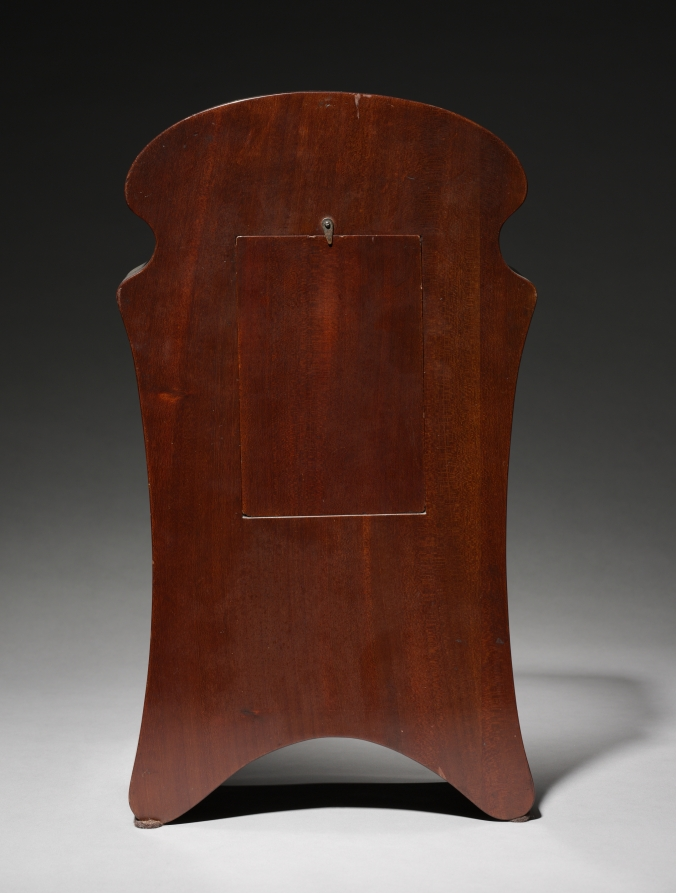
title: Mantle Clock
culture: America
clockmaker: Lenzkirch Clock Factory (German)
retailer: Tiffany & Co. (America, New York, est. 1837)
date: 1901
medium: brass, mahogany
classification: Wood